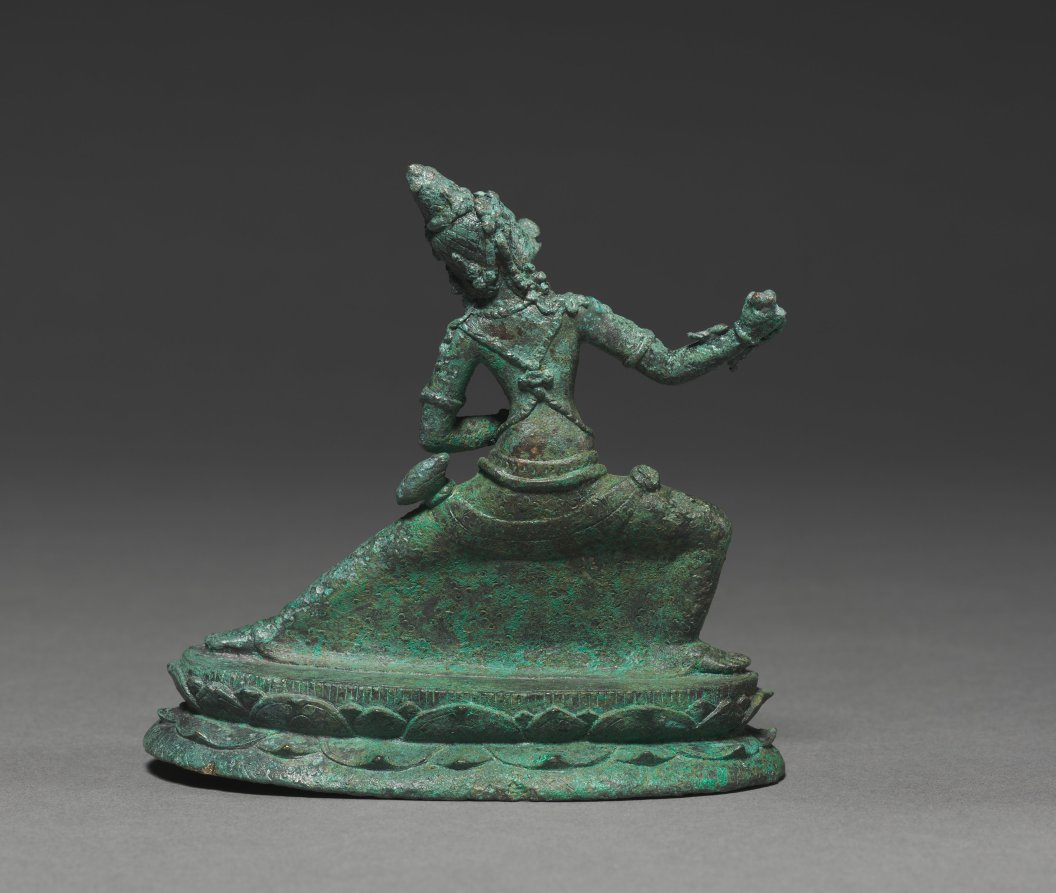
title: Varahi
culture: Java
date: 800s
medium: bronze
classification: Sculpture